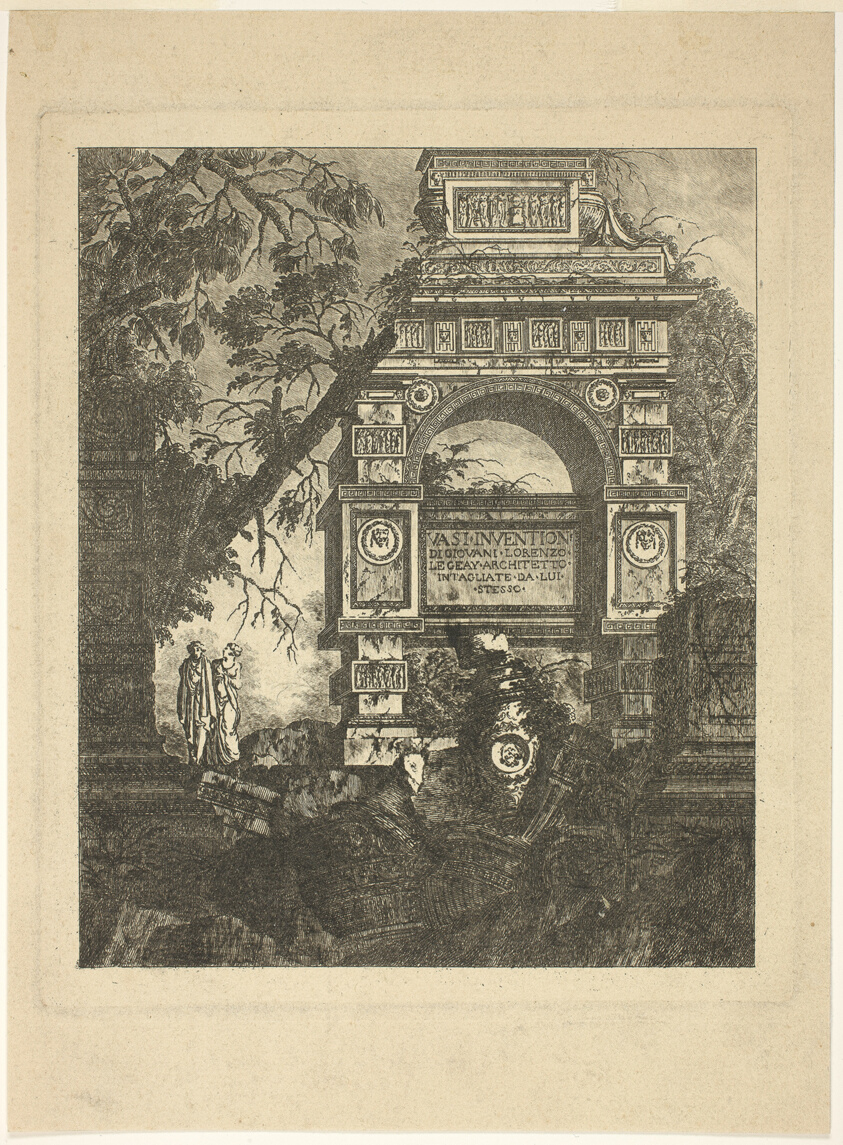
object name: Print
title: Frontispiece, plate one from Vasi Invention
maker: Jean-Laurent Legeay (French, 1710-1786)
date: 1768, published 1770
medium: Etching with drypoint on tan laid paper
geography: France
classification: etching; print; prints and drawing